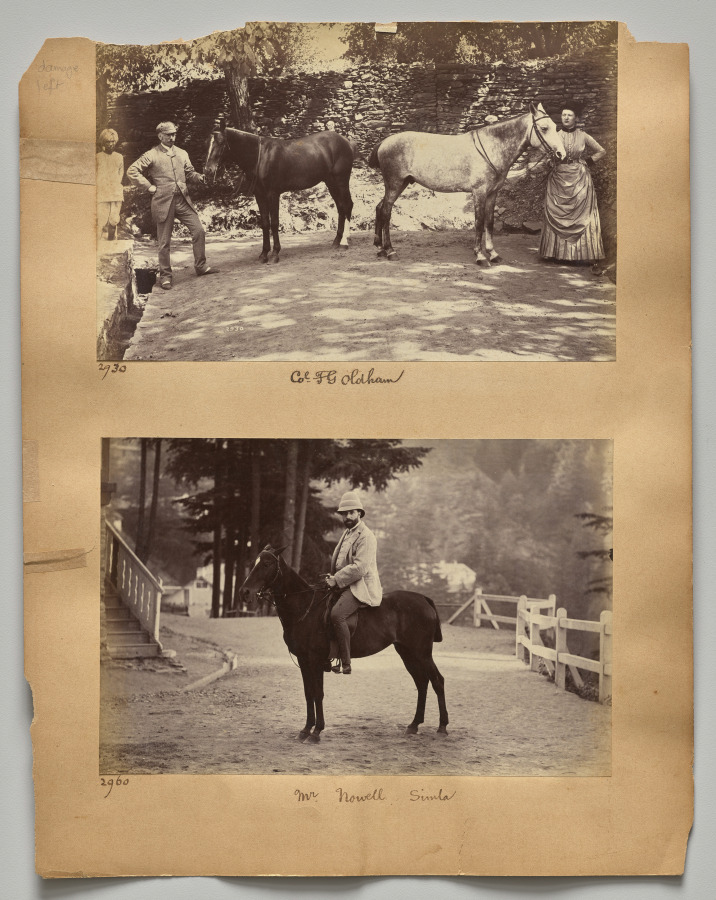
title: Col. F. G. Oldham (recto, top); Mr. Nowell, Shimla (recto, bottom)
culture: India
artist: Raja Deen Dayal (Indian, 1844–1905)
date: c. 1882–87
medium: albumen print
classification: Photograph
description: These photographs are part of an album, now disassembled, of around 105 photographs taken in India between 1885 and summer 1887 that provide glimpses into the lives of the British colonial elite and royal and upper-class Indians. The museum holds another group of 37 pictures from this album (2016.266), which was probably commissioned by a British civil servant visiting or working in India around 1888 as a personal souvenir of his experiences there.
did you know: Raja Deen Dayal is regarded now, and was considered during his lifetime, to be India’s most important 19th-century photographer.